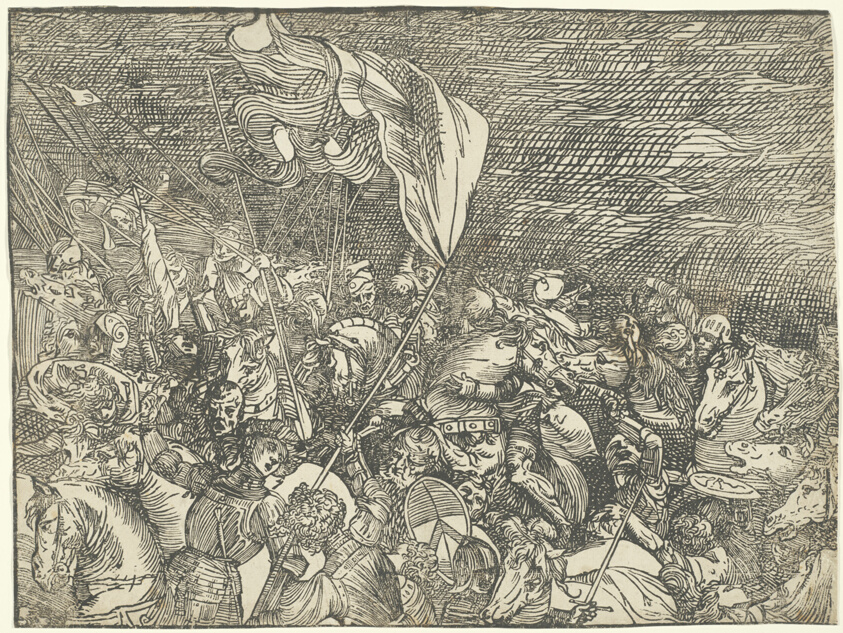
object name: Print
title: The Submersion of Pharaoh's Army in the Red Sea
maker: After Titian (Italian, c. 1488-1576); published by Domenico dalle Greche (Italian, active 1543-1558)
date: c. 1515, printed 1549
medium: Woodcut in black on ivory laid paper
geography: Italy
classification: woodcut; print; prints and drawing